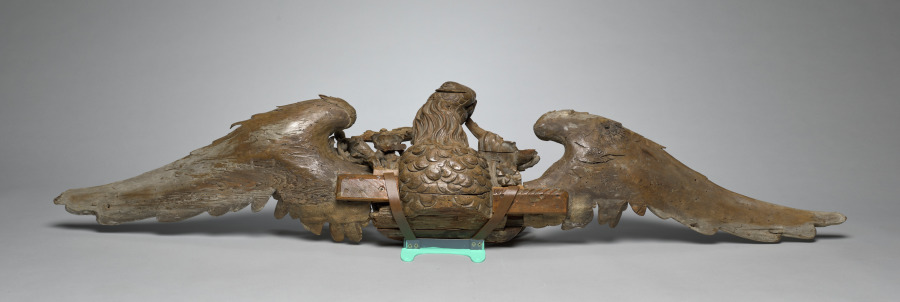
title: Centerpiece of a Carving from an Overmantel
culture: England, 17th century (Charles II)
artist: Grinling Gibbons (British, 1648–1721)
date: c. 1675–1677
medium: lindenwood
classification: Sculpture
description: The arrangement of architectural elements within grand interior spaces in the late 1600s and early 1700s emphasized symmetry and height. Decorative elements such as elaborately carved mantels, mirrors, paintings, and applied wall decorations were often stacked to achieve a visual focal point at one or both ends of the room. This particular overmantel decoration once hung above the fireplace in the Green Drawing Room of the Earl of Essex at Cassiobury in Watford, near London. In 1823, the British painter William Henry Hunt (1790–1864) produced a watercolor of the drawing room which featured this overmantel decoration. Grinling Gibbons was born in Rotterdam, the Netherlands, of English parents. After training there as an artist, he came to England in the 1660s and soon began to work as a sculptor of interior ornament, particularly in wood. One of his first large-scale decorative projects was the series of interiors at Cassiobury House.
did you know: The swags of fruit and foliage featured in this wooden overmantel decoration evoke the bounty of the English countryside.